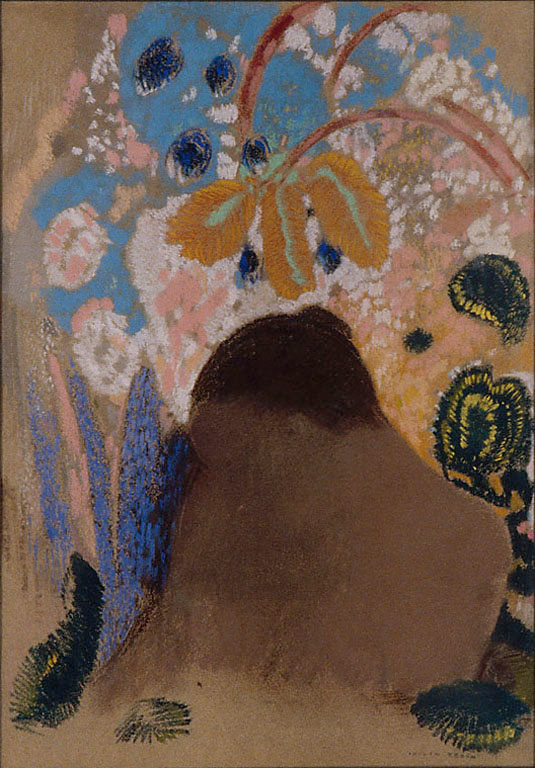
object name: Drawing and Watercolor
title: Ophelia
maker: Odilon Redon (French, 1840-1916)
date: 1906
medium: Pastel on blue-gray wove paper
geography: France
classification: pastel; drawings (visual works); prints and drawing; paper